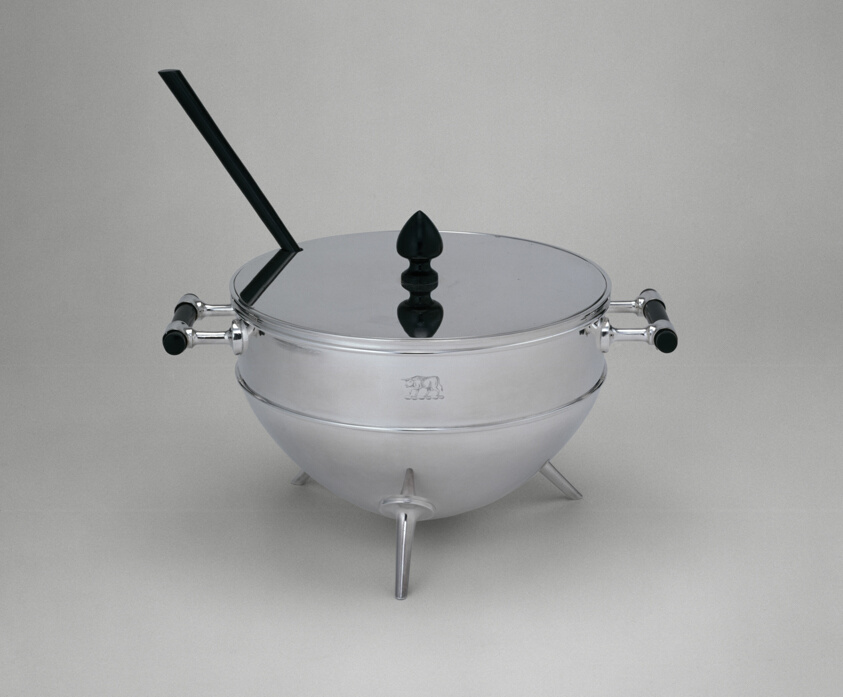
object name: Metalwork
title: Tureen with Cover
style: Japanism, japonism, design reform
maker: Designed by Christopher Dresser (English, born Scotland, 1834-1904); Made by Hukin and Heath (London and Birmingham, England, 1855-1953)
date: c. 1880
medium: Electroplated silver and ebony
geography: Birmingham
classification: metalwork; silver; european decorative arts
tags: Tureen